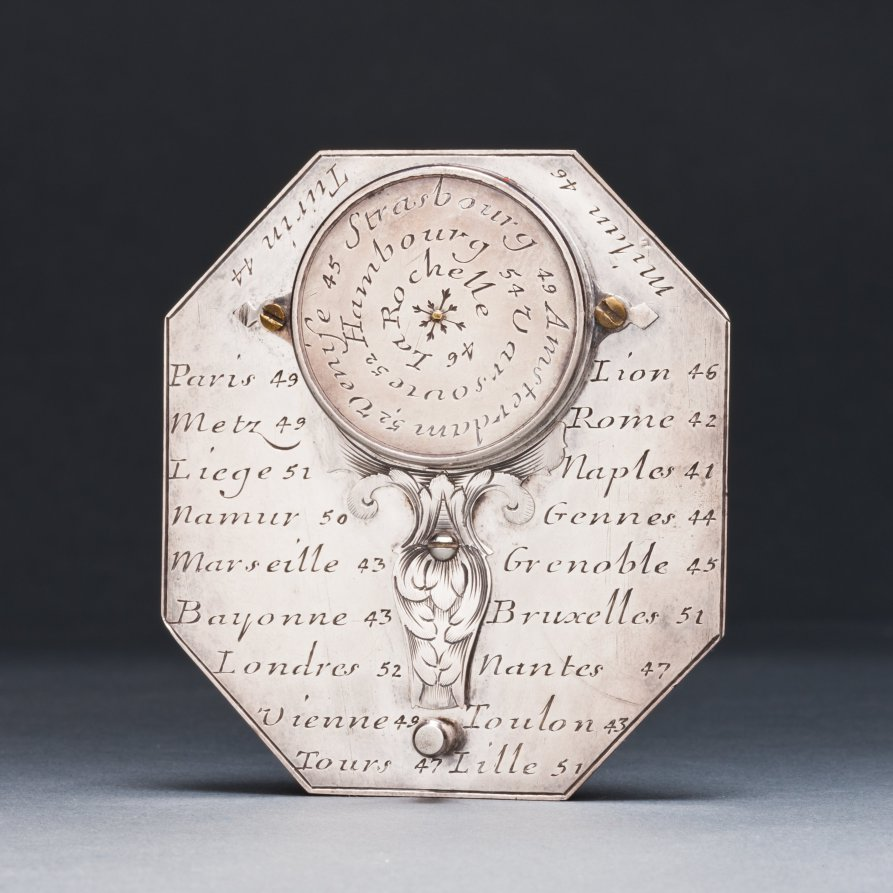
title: Butterfield Sundial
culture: France, 18th century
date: 1700s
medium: silver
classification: Silver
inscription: [Engraved signature above the compass in ribbon band]: "N. BION A Paris"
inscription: [Engraved on the face of the sundial]: “Pour 55° 4-5-6-7-8-9-10-11 50° IIII-V-VI-VII-VIII-IX-X-XI 45° 5-6-7-8-9-10-11 40° -VI-VII-VIII-IX-X-XI'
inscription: [Engraved on the other side]: "Pour 55° -8-7-6-5-4-3-2-1-0 50°-VIII-VII-VI-V-IIII-III-II-I 45°-8-7-6-5-4-3-2-1 40°-VII-VI-V-IIII-III-II-I"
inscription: [Engraved around the compass]: “NORD-OUEST-SUD-EST”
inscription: [Engraved on the back of the sundial]: “Turin 44 Milan 46 Paris 49 Lion 46 Metz 49 Rome 42 Liege 51 Naples 44 Namur 50 Gennes 44 Marseille 43 Grenoble 45 Bayonne 43 Bruxelle 51 Londres 52 Nantes 47 Vienne 48 Toulon 43 Tours 47 Lille 51”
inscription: [Engraved around the back of the compass]: “Venise 45 Strasbourg 49 Amsterdam 52 Hambourg 54 Varsovie 52 La Rochelle 46”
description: Butterfield-type sundials are characterized by their adjustable gnomons, metal flaps that cast a shadow on the dial’s face to indicate the hour, and geographical indices. This sundial has a scale adjustable between latitudes of 40° to 60° north. The latitudes of 26 European towns are engraved on its back for quick reference. With an intricately engraved silver face, it would have functioned as a fashionable traveler’s accessory.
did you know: Butterfield-style sundials were named after Micheal Butterfield, an English scientific and mathematical instrument maker who worked in Paris between 1674 and 1724.